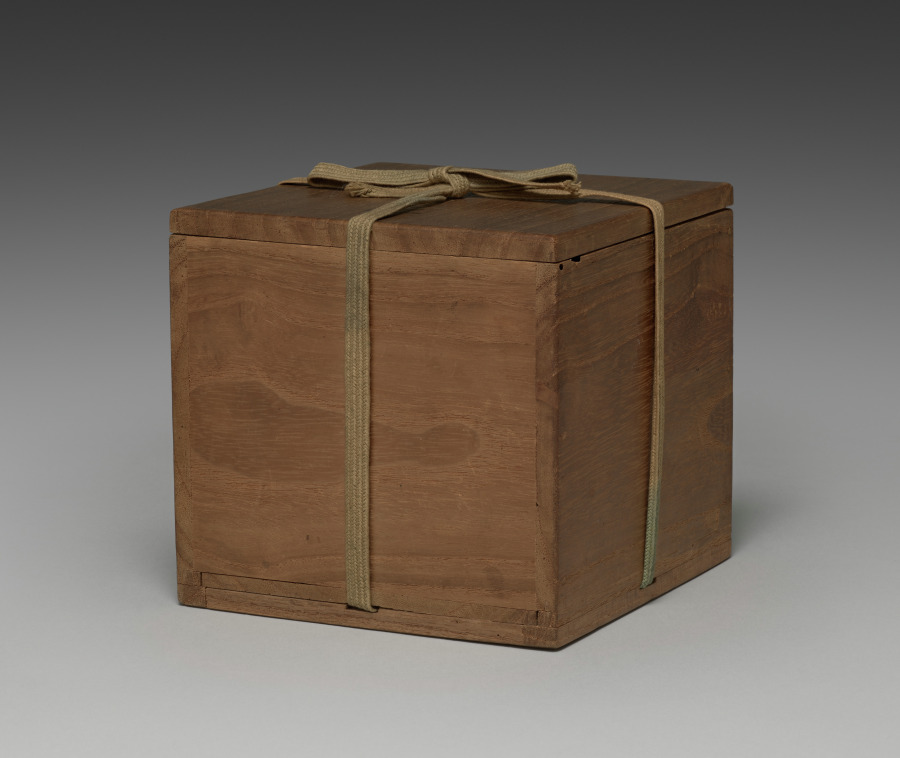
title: Box with Butterfly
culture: Japan, Meiji period (1868–1912)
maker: Seifū Yohei I (Japanese, 1801–1861)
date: 1855–57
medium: Porcelain with underglaze blue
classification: Ceramic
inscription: 清風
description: This sturdy box, with comparatively thick walls and resulting heft, is sparsely decorated with a single butterfly motif in dark underglaze blue cobalt in one corner of the lid and with repeating floral patterns along the lid and base. Single broken lines of underglaze blue define the edge of the box lid’s top where it curves to meet the sides and again where it meets the base of the box. Another blue band runs around the upper rim of the base where it meets the lip, left unglazed for a better grip of the lid when the box is closed. Yohei I’s signature on the center of the recessed base is set within a wide blue square. The porcelain box is meant to call to mind a famous story attributed to Zhuang Zhou (c. 369–286 BCE), also known as Master Zhuang, or Zhuangzi, pronounced Soji in Japanese. The second chapter of Zhuangzi, his eponymous collection of anecdotes, records the story as follows: Once, Zhuang Zhou dreamt he was a butterfly, a butterfly flitting and fluttering about, happy with himself and doing as he pleased. He didn’t know that he was Zhuang Zhou. Suddenly, he woke up and there he was, solid and unmistakable Zhuang Zhou. But he didn’t know if he was Zhuang Zhou who had dreamt he was a butterfly, or a butterfly dreaming that he was Zhuang Zhou. Between Zhuang Zhou and the butterfly there must be some distinction! This is called the Transformation of Things. The lidded box resembles kosometsuke, the porcelains in underglaze blue made to order or on speculation for the Japanese market during the early to mid-1600s in Jingdezhen, China. These works were often made from designs submitted by Japanese clients, many of whom were masters of chanoyu, who sought the wares for their tea practice. The relative roughness of the clay and the distortions in the fired object were intentional, as they created the rustic effect desired by Japanese tea communities.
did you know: It is possible that the model for this box was a smaller lidded box meant for storing incense.